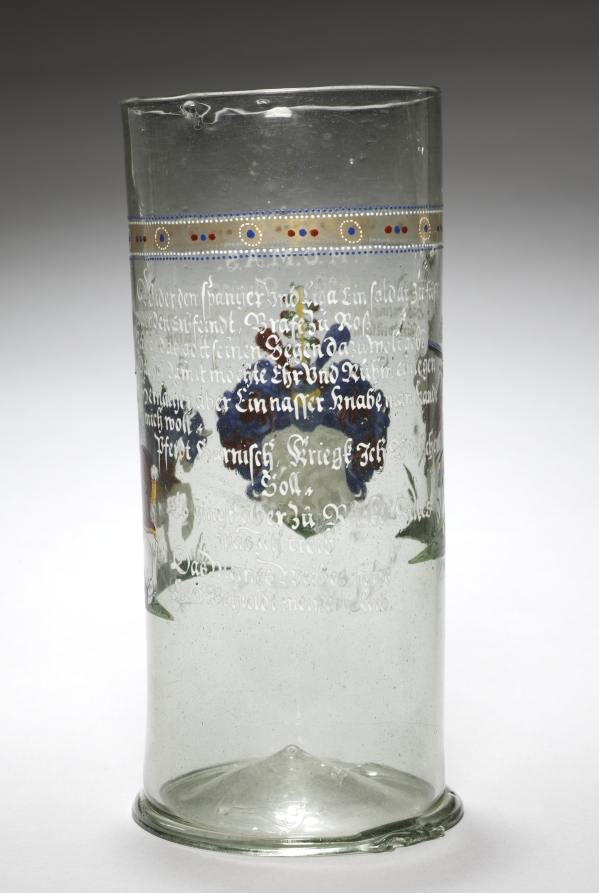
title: Beaker ("Welcome Glass") with Arms and Inscriptions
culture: Germany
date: 1616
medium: enameled glass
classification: Glass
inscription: THOMAS V. SANITZ ZU BRAUSZFELDE ERBSESSENN HABE MEINEN VETTER HANS V. SANITZ DISZ GLASZ ZUM WILLKOMMEN VEREHRETT. (Thomas von Sanitz has given this glass to my cousin, Hans von Sanitz, in welcome.)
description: The inscription tells that this beaker was given by Thomas V. Sanitz zu Brausfelde Erbsessen to welcome his cousin Hans V. Sanitz.